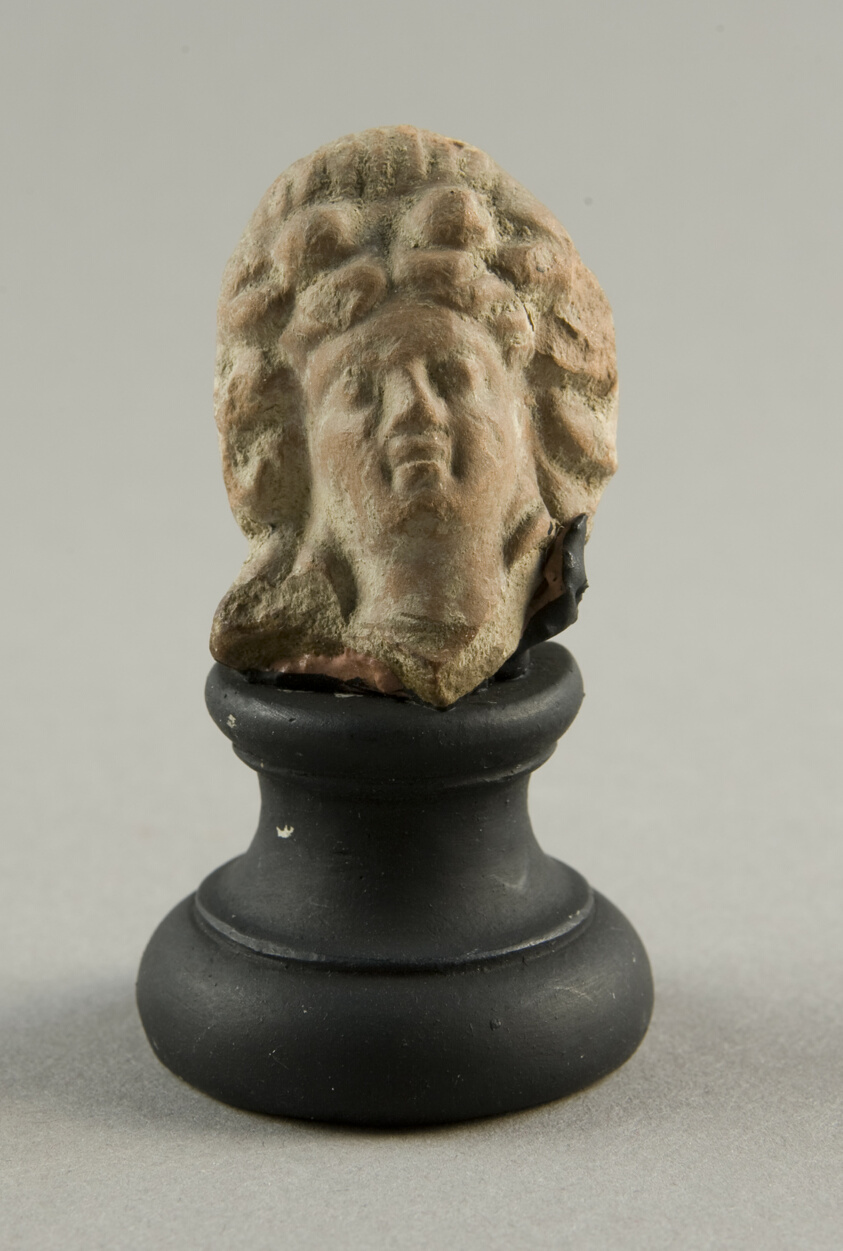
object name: Sculpture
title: Head of a Woman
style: greek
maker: Greek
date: 3rd-2nd century BCE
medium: terracotta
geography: Greece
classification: earthenware; ceramics; sculpture; ancient art